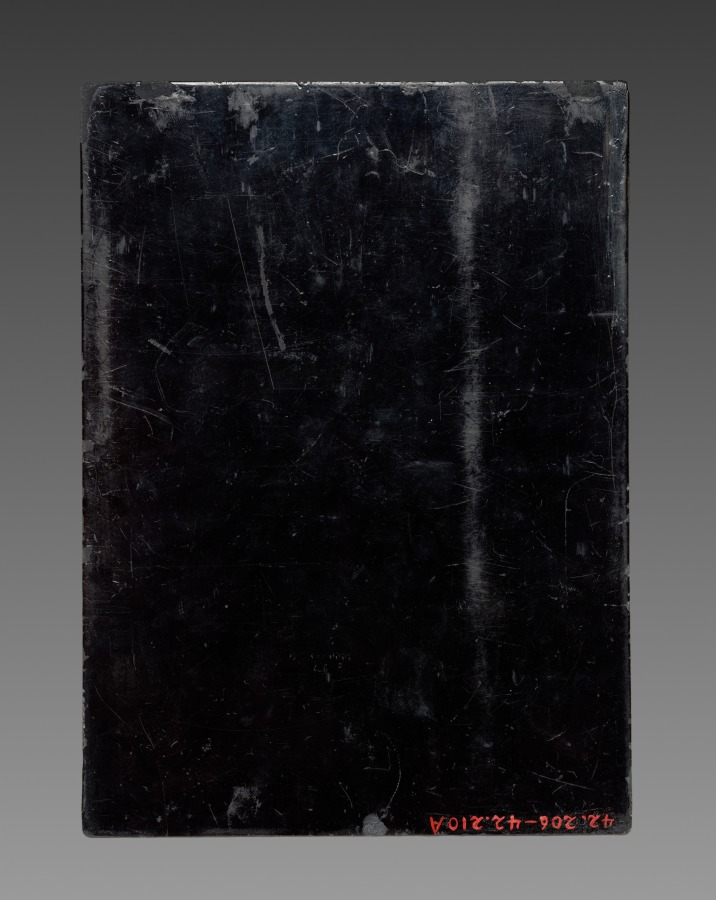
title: Box with Ink Cakes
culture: China, Qing dynasty (1644-1911), Jiaqing reign (1795-1820)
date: 1795–1820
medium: lacquer and silk box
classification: Lacquer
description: Ink cakes (also called ink sticks) are dissolved with the addition of water and then ground on the surface of a flat square stone into liquid ink for painting and calligraphy. The precious ink cakes here, however, have never been used. The inscription on the side of the blue ink cake says that the set was commissioned by Chen Huai, Governor of Jiangxi Province.